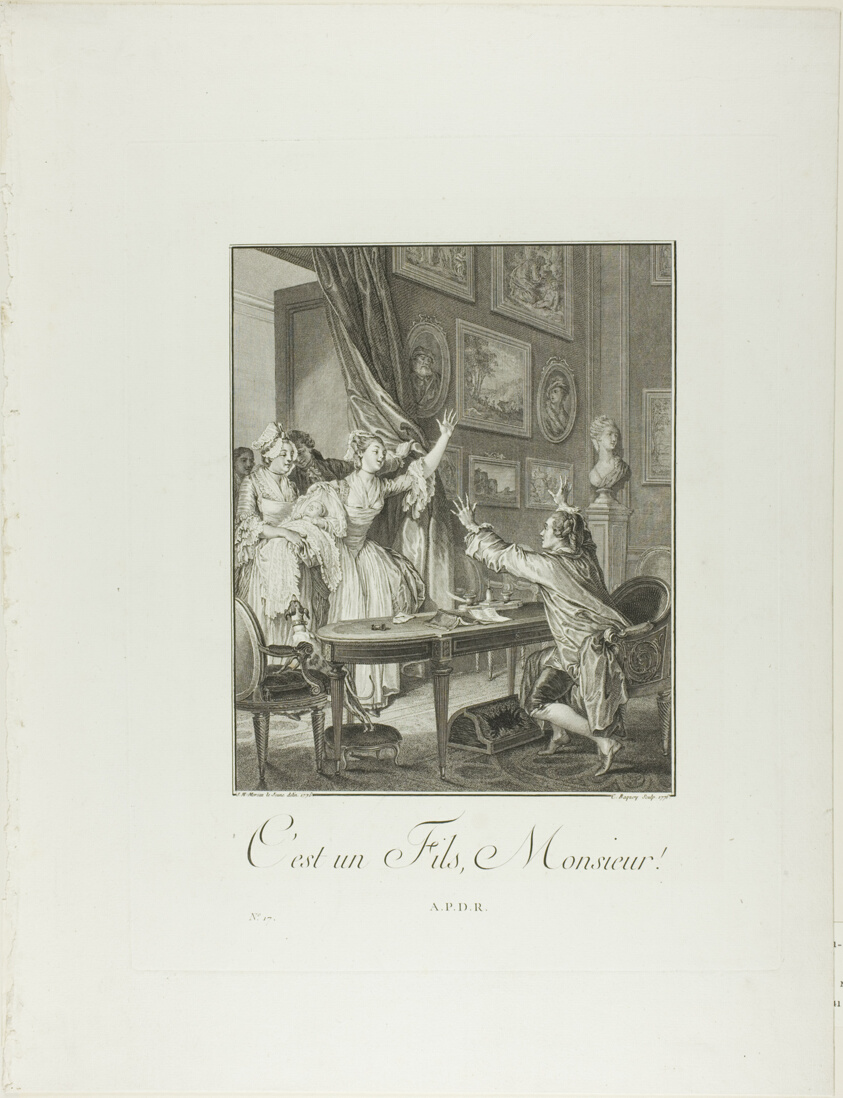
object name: Print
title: It's a Boy!, from Monument du Costume Physique et Moral de la fin du Dix-huitième siècle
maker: Jean Charles Baquoy (French, 1721-1777); after Jean Michel Moreau (French, 1741-1814); published by Laurent-François Prault (French 1712-1780)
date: 1776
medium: Engraving on paper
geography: France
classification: etching; print; prints and drawing